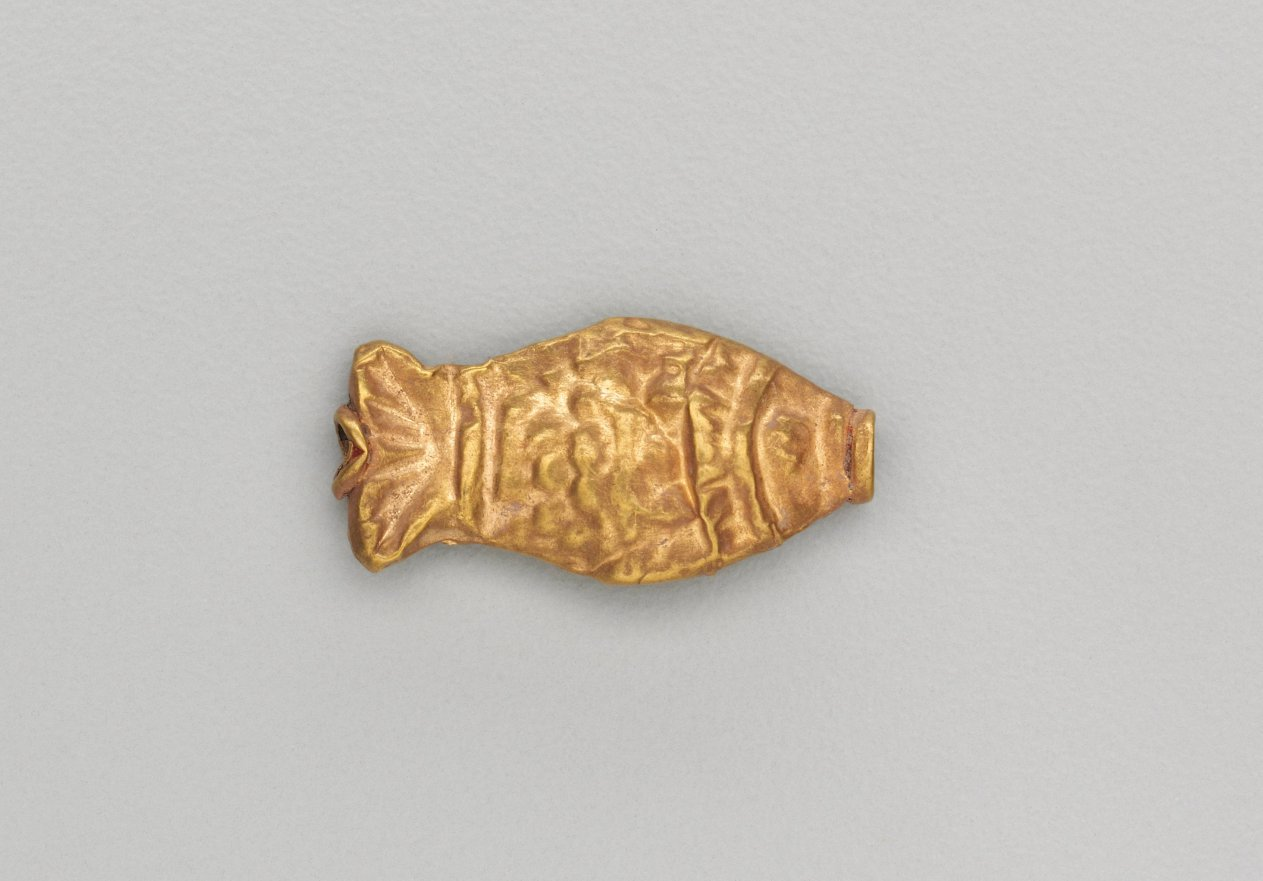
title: Necklace Bead in the Form of a Fish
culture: India, Shunga period (185–78 BCE)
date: 185–72 BCE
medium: gold repoussé with granulation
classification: Jewelry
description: Jewelry in ancient India often consisted of elements associated with water, such as fish and other aquatic plants and animals. Since water is essential for life, imagery that connotes water is life-affirming, or auspicious, and therefore appropriate adornment.